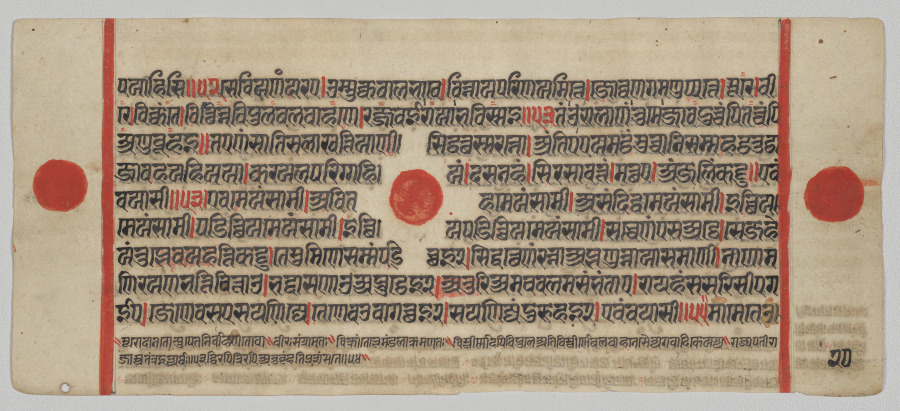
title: Text, Folio 20 (verso), from a Kalpa-sutra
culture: Western India, Gujarat, last quarter of the 15th century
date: c. 1475–1505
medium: Gum tempera, ink, and gold on paper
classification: Painting